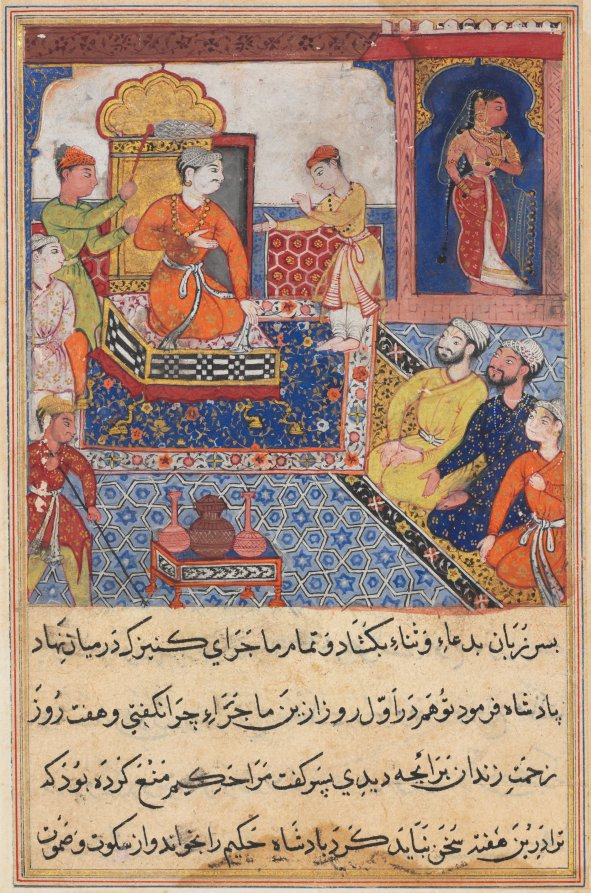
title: The young prince recounts his experiences to his father, the king, from a Tuti-nama (Tales of a Parrot): Eighth Night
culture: Mughal India, court of Akbar (reigned 1556–1605)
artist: Suraju (Indian)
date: c. 1560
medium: gum tempera, ink, and gold on paper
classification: Painting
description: After seven days the young prince’s vow of silence has come to an end, and he is finally able to speak and defend himself against false charges of assault by the handmaiden. He addresses his enthroned father while the surrounding members of the king’s court look on. The deceitful handmaiden who accused the prince stands alone in the chamber in the upper right.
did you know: The prince’s tutor had forbidden him from speaking for the last week.